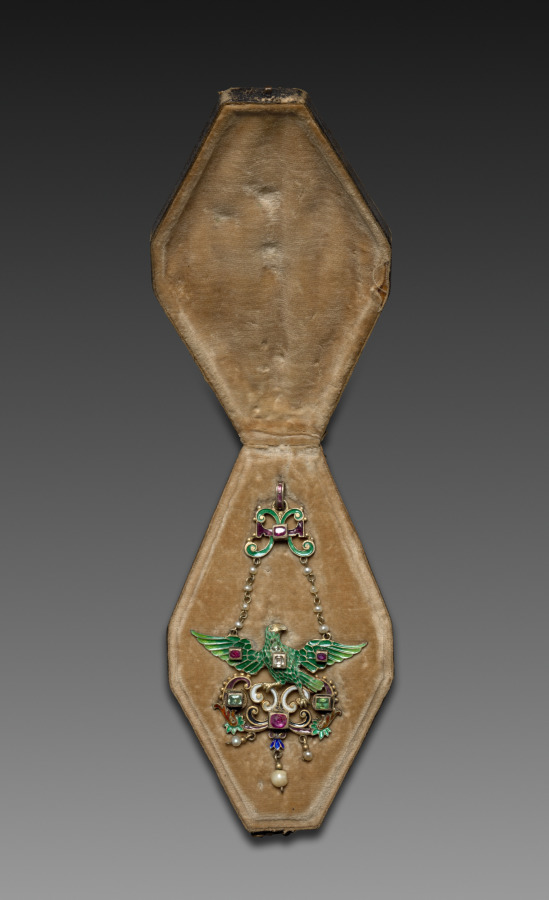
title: Pendant and Chain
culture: Germany, 19th century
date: 1800s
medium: metal and enamel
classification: Jewelry